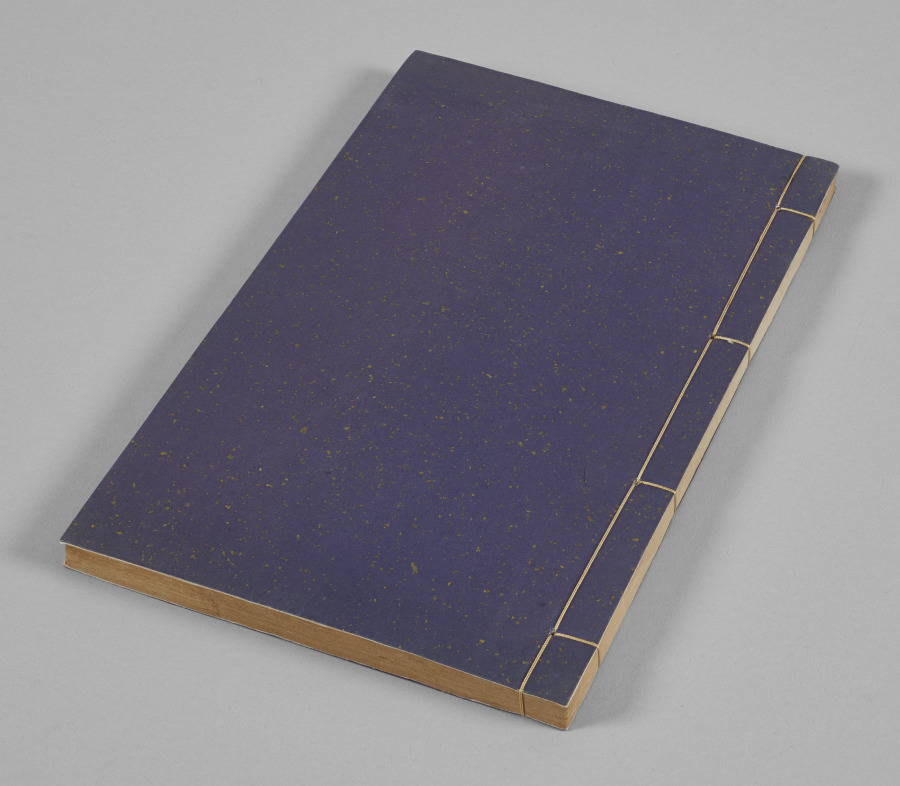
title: Yu-hai (The Ocean of Jade)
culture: China, Ming dynasty (1368–1644)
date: 1368–1644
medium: woodblock-printed book with painted edges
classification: Bound Volume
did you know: When each book is rolled to form a cylinder, a landscape appears on the edges, painted in ink and washes of color.